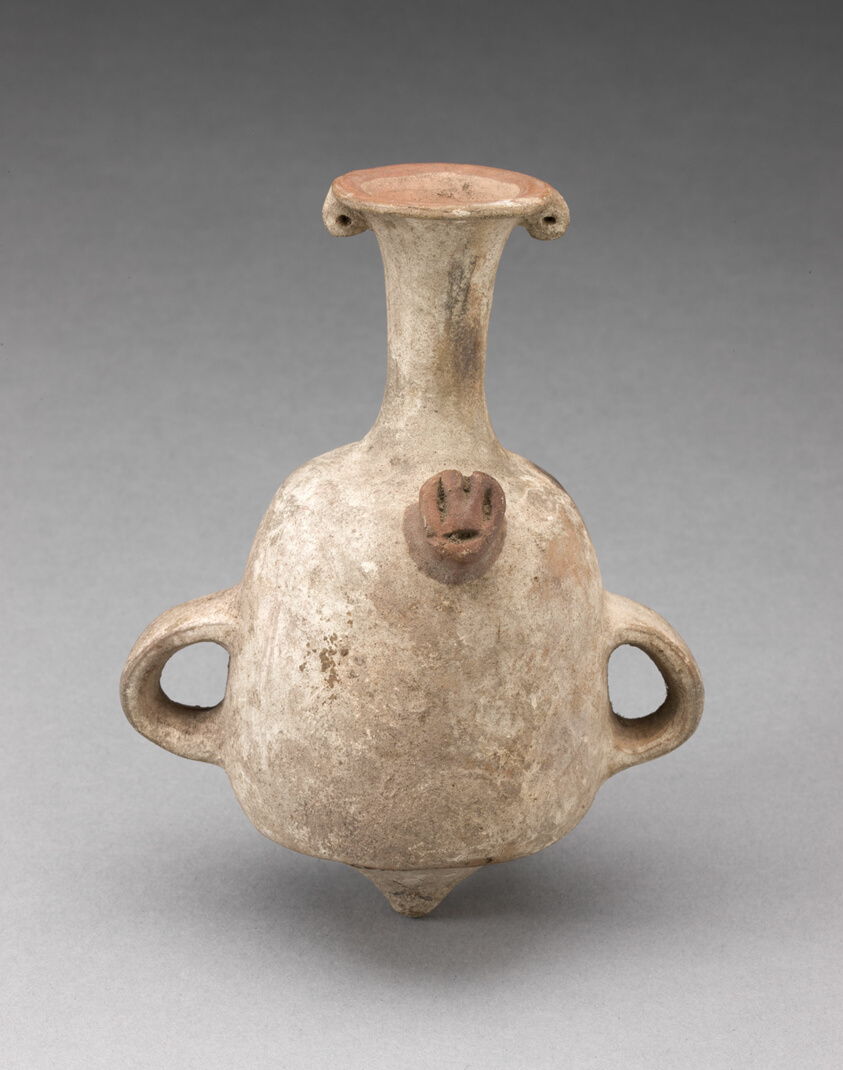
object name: Vessel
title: Reduced-scale Vessel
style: inca, late intermediate period, Pre-Columbian, americas, Arts of the Americas, andean, andes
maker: Inca (South coast or southern highlands, Peru)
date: 1450–1532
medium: Ceramic and pigment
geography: Southern Highlands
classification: earthenware; ceramics; vessel; art of the americas